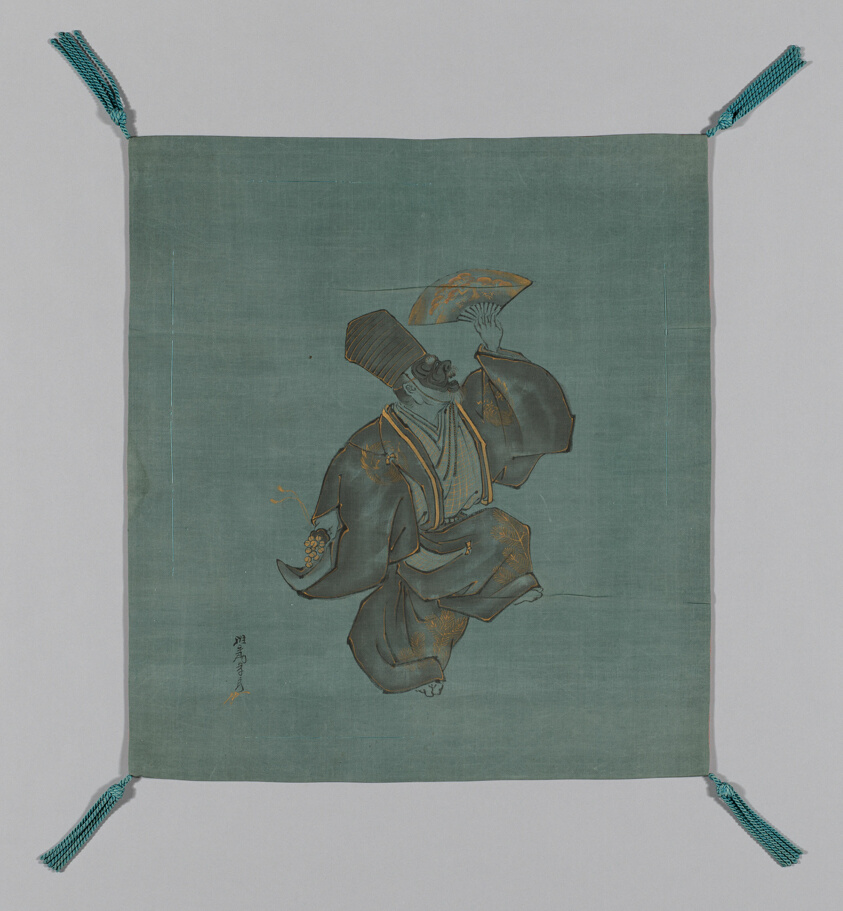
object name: Textile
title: Fukusa (Gift Cover)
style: late edo, edo (japanese period), Japanism, East Asian, asian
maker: Painted by Saeki Ganryô (Japanese, active c. 1901/25); Japan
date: late Edo period (1789–1868), early 19th century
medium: Patterned side: silk, warp-faced, weft-ribbed plain weave (shioze); painted with India ink (sumi) and gold paint; lining: silk, wrap-faced, weft-ribbed plain weave (shioze); sewn with front and lining matched in size (Tachikire awrase); silk, running "controlling" stitches along all edges; corners: silk, knotted and re-piled fringe tassels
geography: Japan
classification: textile; weaving - printed; weaving